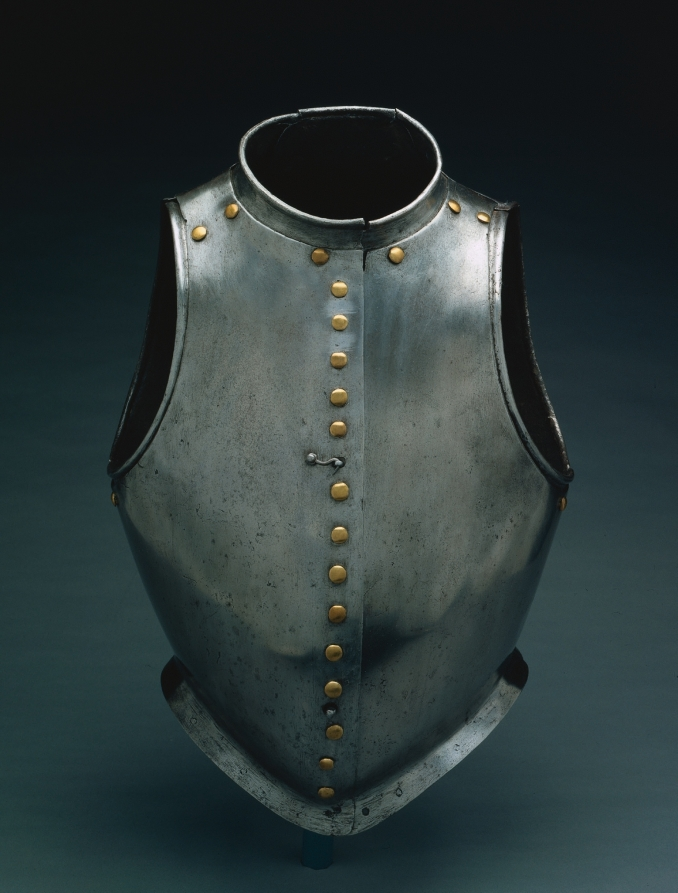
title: "Waistcoat" Cuirass (Combined Breast and Backplates)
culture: North Italy, 16th century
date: c. 1580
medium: Steel; brass rivets simulating buttons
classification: Arms and Armor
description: This cuirass is a specialized type of costume armor. In addition to protecting its owner's torso, it was clearly intended to simulate a civilian jacket, or doublet, with a row of buttons down the front. The owner would have opened it like an ordinary doublet since the two halves are hinged to a narrow backplate.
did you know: While it would provide some protection to the torso, the armor here is very light; fashion not function was the prerequisite.